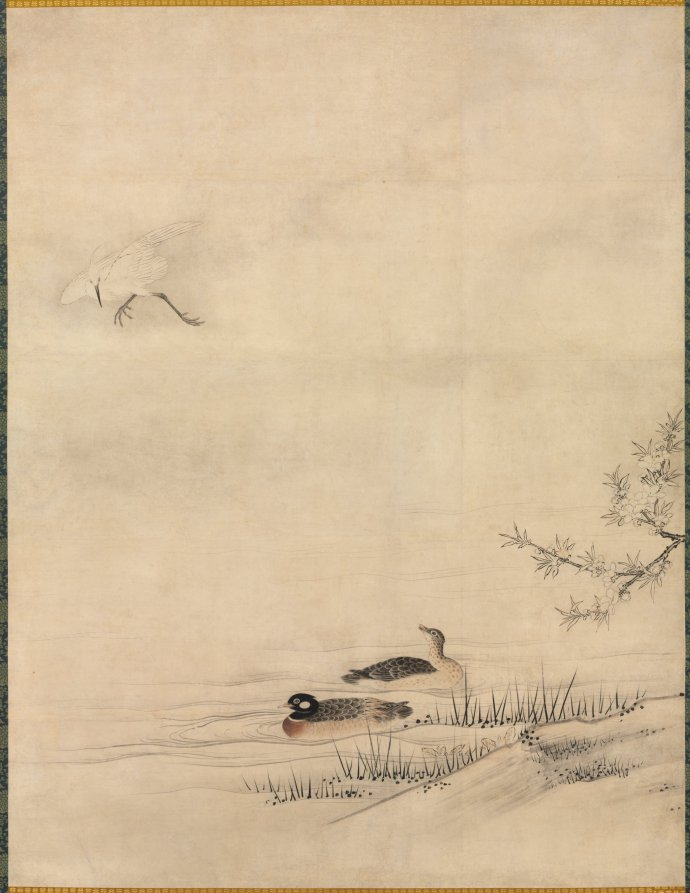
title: Flowers and Birds in a Spring Landscape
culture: Japan, Muromachi period (1392–1573)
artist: attributed to Kano Motonobu (Japanese, c. 1476–1559)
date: 1500s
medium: One of a set of sliding door panels mounted as hanging scrolls; ink and color on paper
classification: Painting